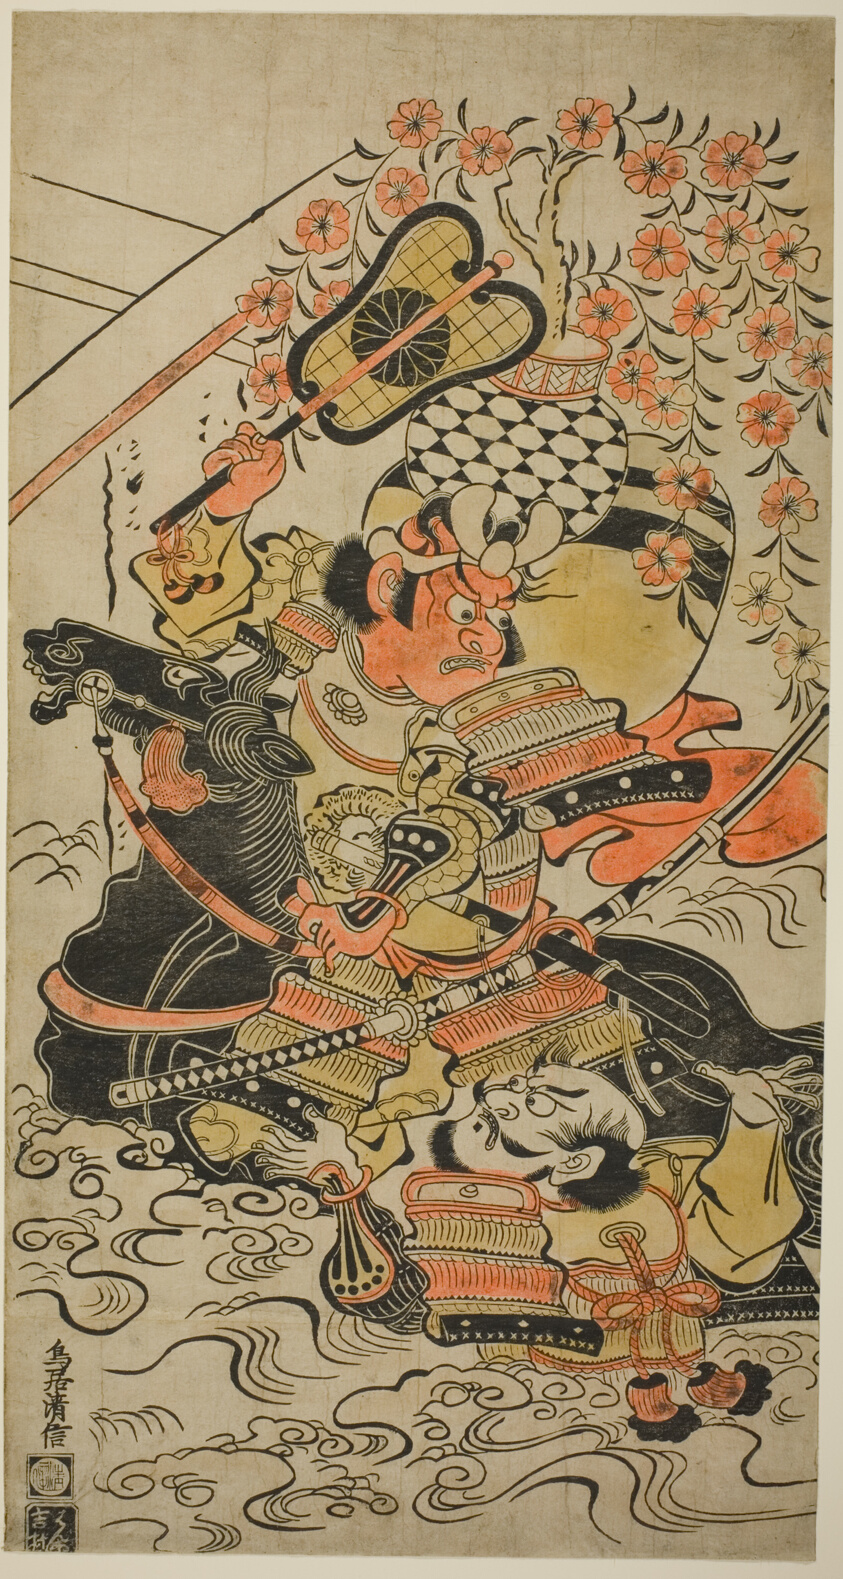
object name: Print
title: A Battle in Mid-Stream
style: Japanese (culture or style)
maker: Torii Kiyonobu I (Japanese, 1664–1729)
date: c. 1705/10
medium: Hand-colored woodblock print; o-oban, tan-e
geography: Japan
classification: woodblock print; print; asian art